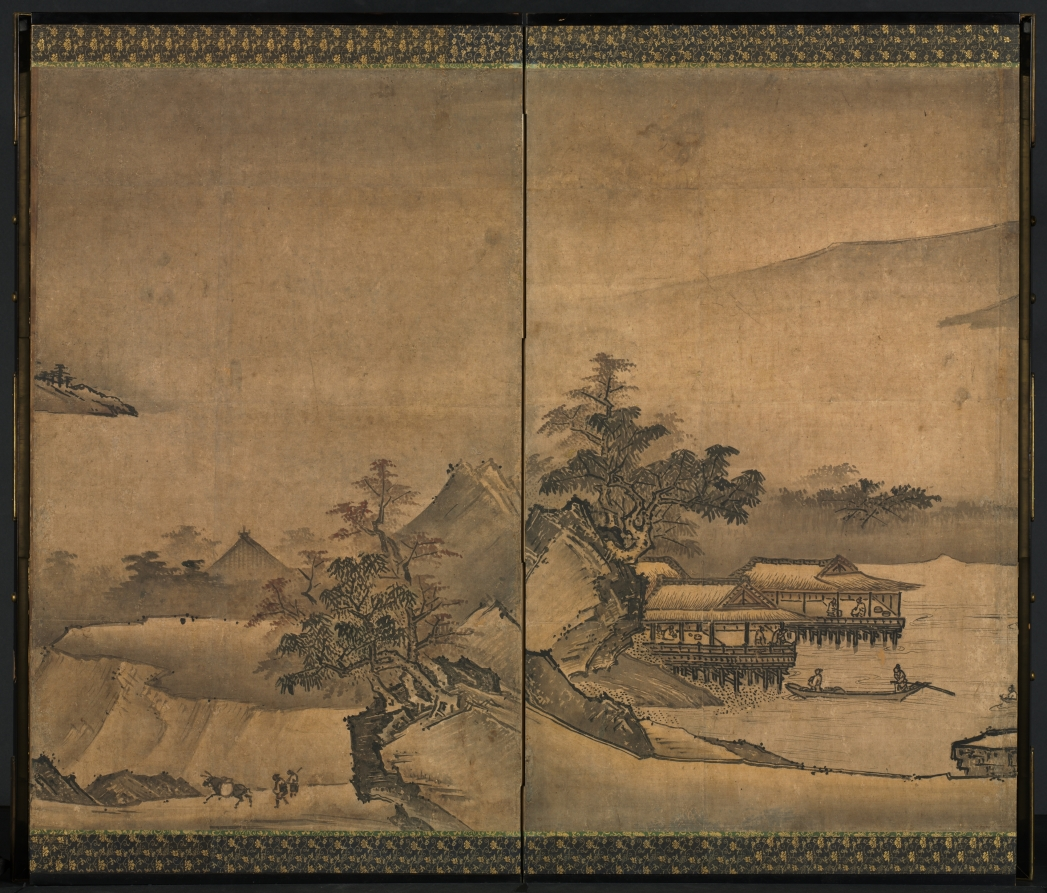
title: Landscape of the Four Seasons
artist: Yi Sumun (Korean, b. c. 1404)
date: late 1400s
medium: One of a pair of six-panel screens; ink and slight color on paper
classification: Painting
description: Yi Sumun is believed to have been a Korean painter who migrated to Japan in 1424 at the age of 20. This pair of screens is the artist’s most important composition in this format. Viewed from right to left, the screens show the passage of the four seasons, a popular theme in medieval Japanese ink painting.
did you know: Yi Sumun is believed to have been a Korean man who moved to Japan at the age of 20 and became an influential landscape painter in Japan.